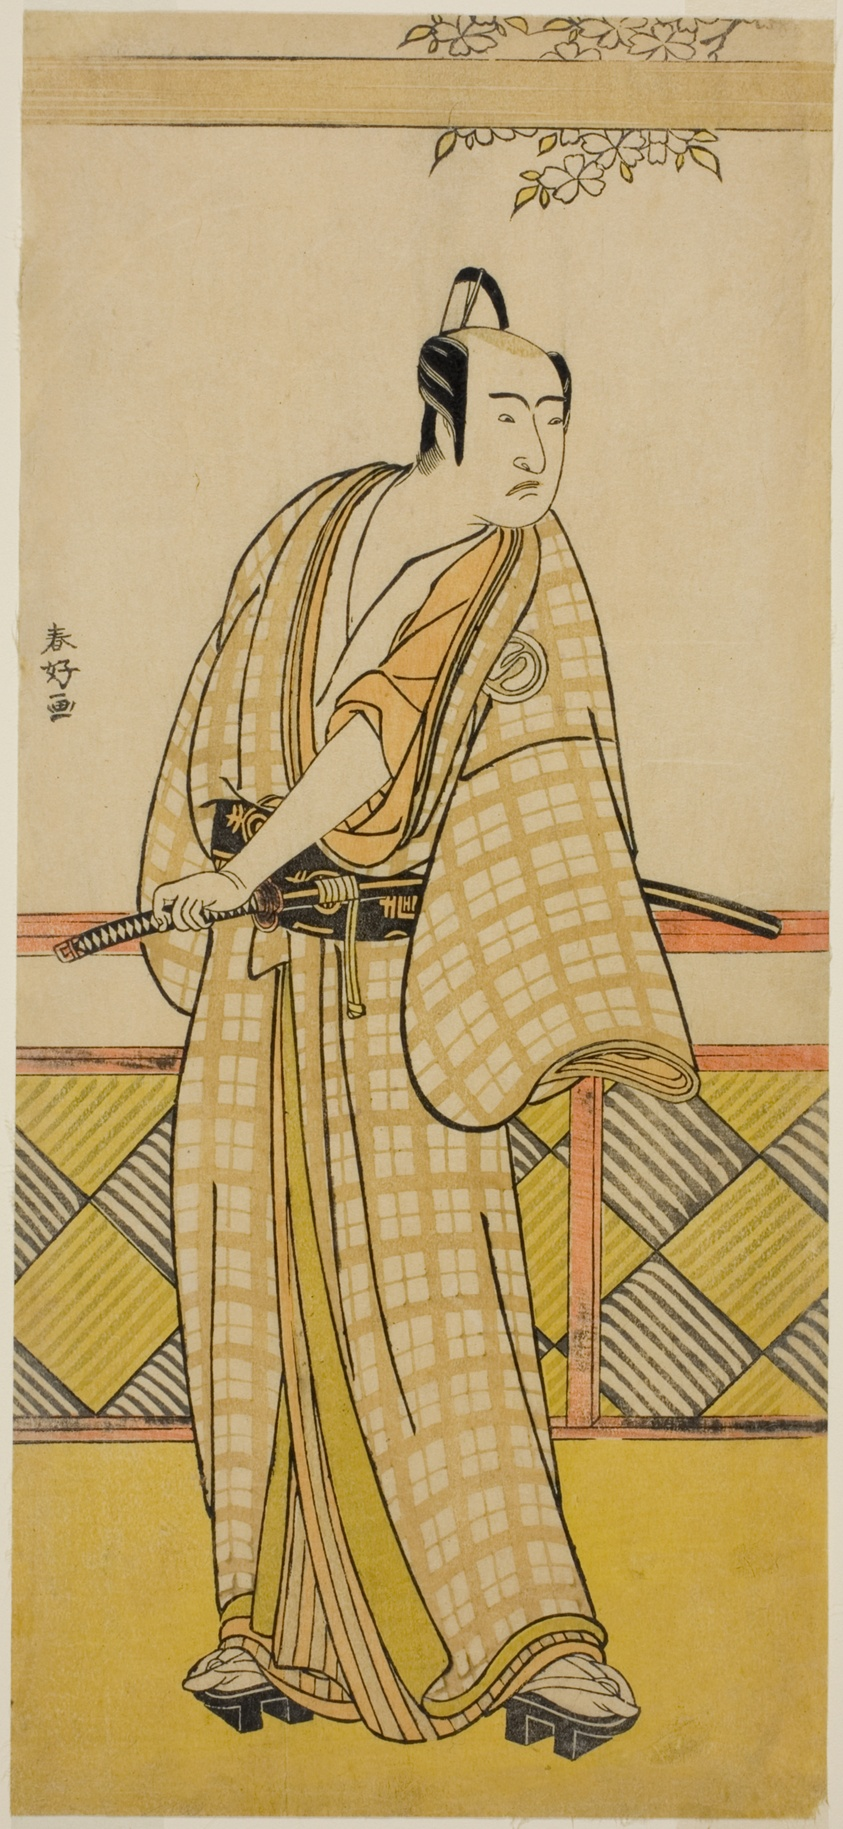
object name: Print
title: The Actor Sawamura Sojuro III in an Unidentified Role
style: Japanese (culture or style)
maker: Katsukawa Shunko I; Japanese, 1743-1812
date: late 1780s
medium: Color woodblock print; hosoban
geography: Japan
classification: woodblock print; print; asian art